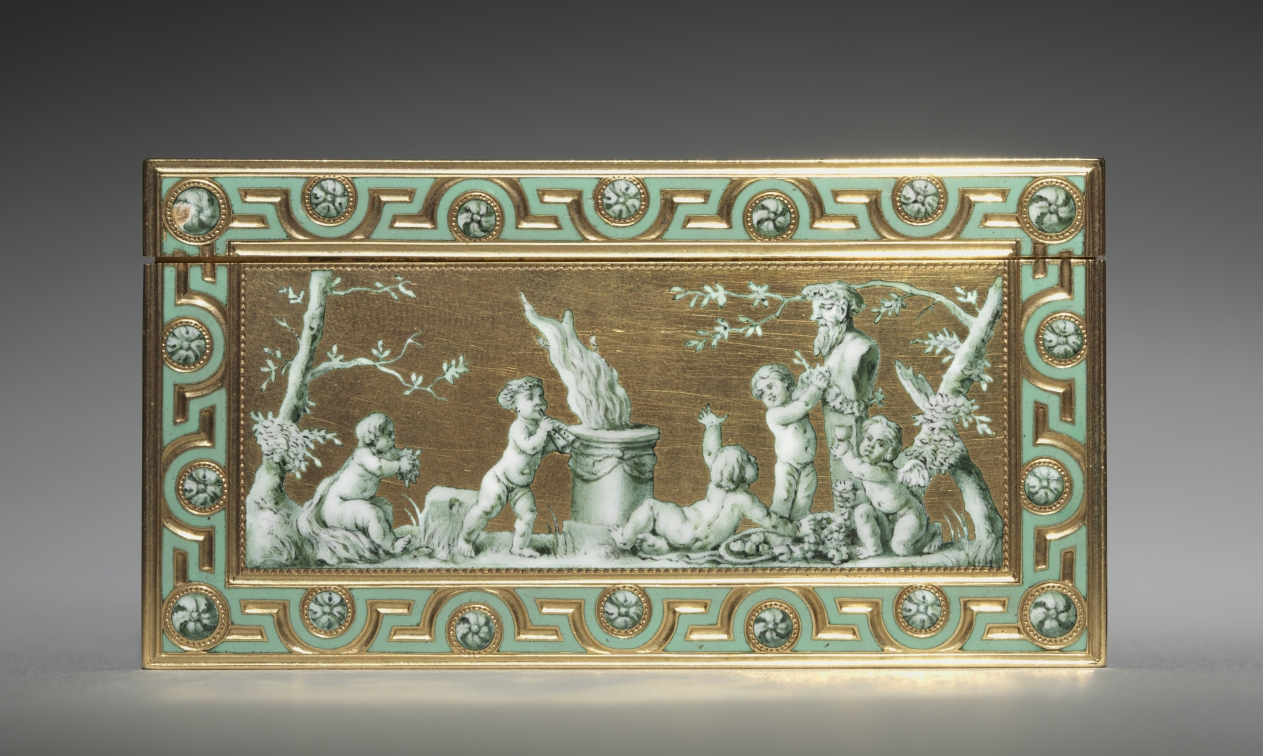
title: Box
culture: France, 18th century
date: c. 1768–1769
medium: gold and enamel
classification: Enamel